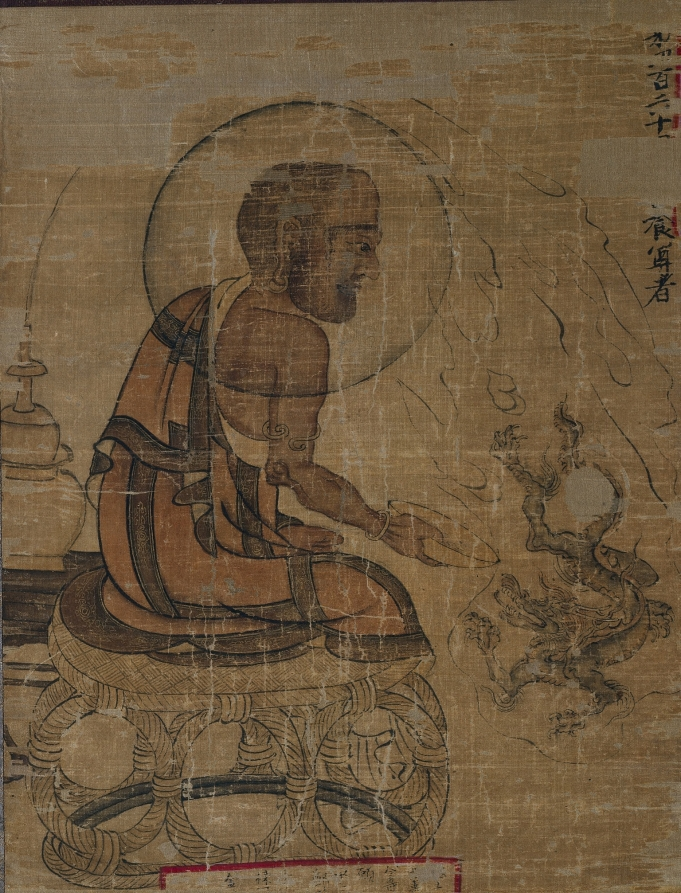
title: Arhat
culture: Korea, Goryeo dynasty (918–1392)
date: 1235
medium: Hanging scroll; ink and slight color on silk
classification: Painting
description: An arhat (Nahan in Korean), an advanced disciple of the Buddha, is represented here in profile with a halo encircling his head. This particular arhat is Segongyang jonja, numbered as the 464th of 500 arhats. He sits on a woven bamboo stool, is luring a dragon into an alms bowl. This hanging scroll is one of only about ten known works that survive today, all of which (except for Cleveland’s piece) are currently preserved in Korea or Japan.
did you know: This painting that depicts an arhat, a human being who has achieved enlightenment, used to be part of a set of 500 hanging scrolls.